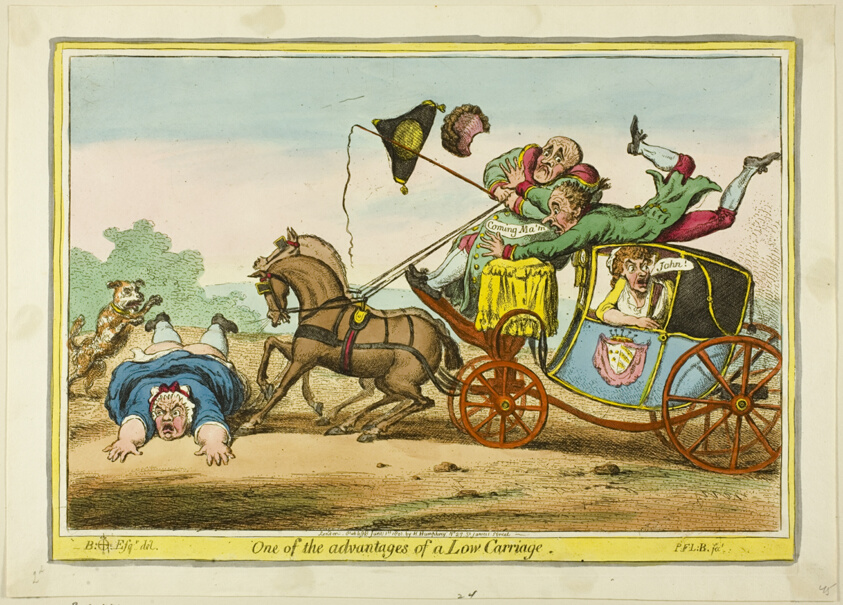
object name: Print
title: One of the Advantages of a Low Carriage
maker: James Gillray (English, 1756-1815); published by Hannah Humphrey (English, c. 1745-1818)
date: published June 1, 1801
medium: Hand-colored etching on paper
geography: England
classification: etching; print; prints and drawing